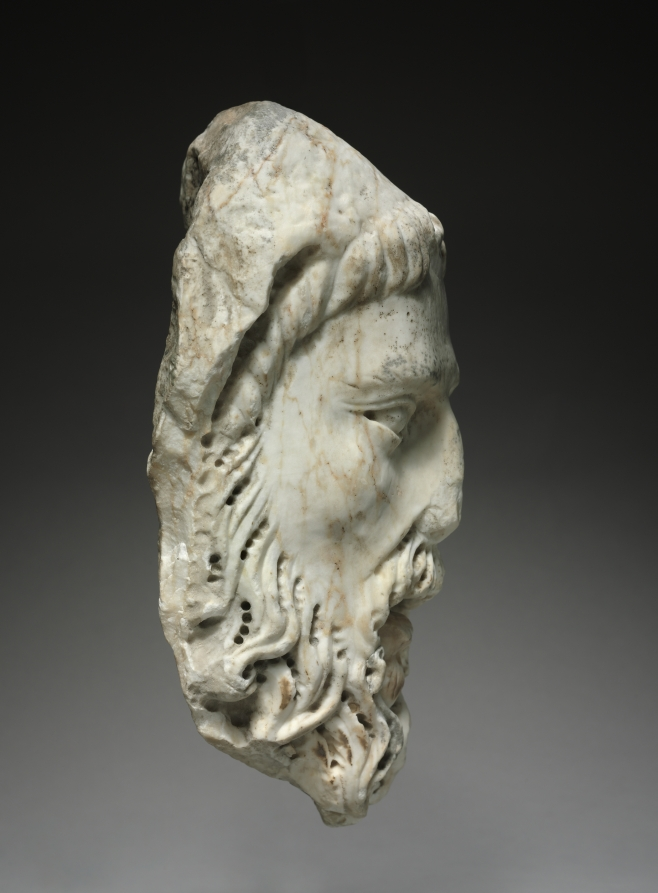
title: Head of a Prophet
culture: Italy, Siena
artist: workshop of Giovanni Pisano (Italian, c. 1240-c. 1320)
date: c. 1300–1325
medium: marble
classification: Sculpture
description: This head exhibits many of the characteristics of the style associated with the workshop of Giovanni Pisano. These are particularly noteworthy in the sensitive carving of the haunting face and its strikingly drilled beard. The head compares favorably to the sculpture made while Giovanni was master of works at Siena Cathedral (1285-97). Recent research suggests that it may once have belonged to a full-length Old Testament prophet looming on the exterior of Siena Cathedral.